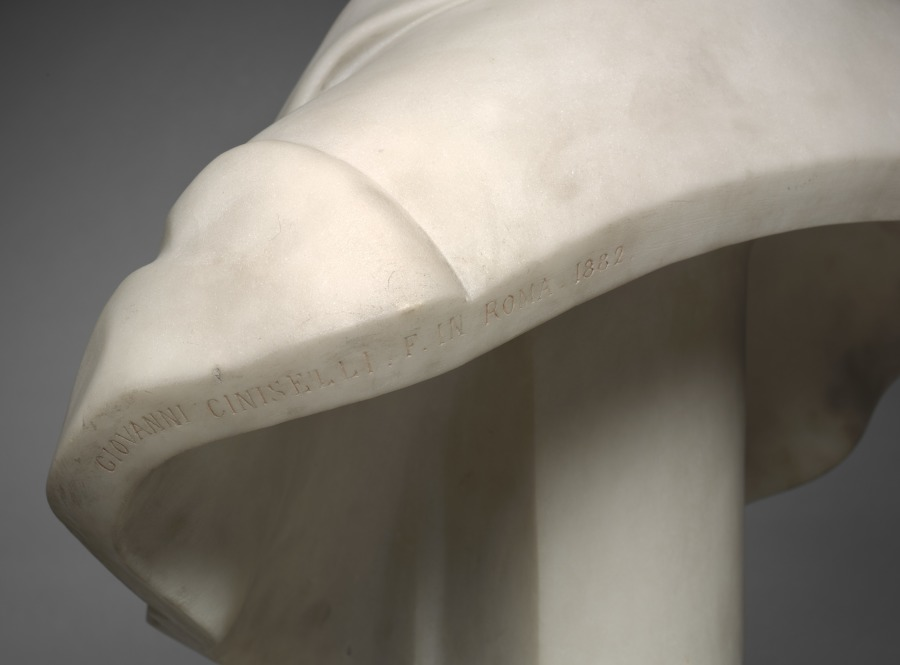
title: Bust of Hinman B. Hurlbut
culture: Italy, Rome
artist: Giovanni Cintselli (Italian, 1832–1883)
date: c. 1870–83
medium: marble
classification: Sculpture